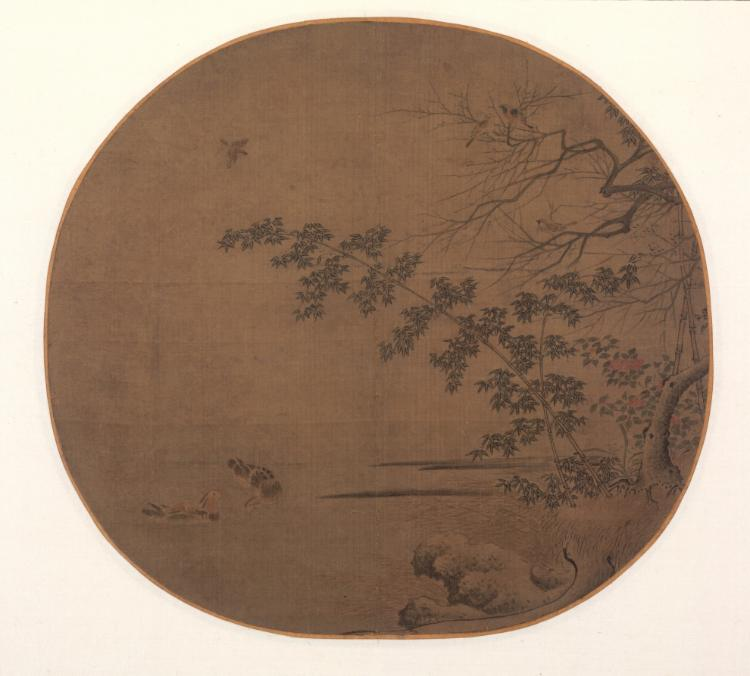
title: Birds on an Autumn Inlet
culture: China, Southern Song dynasty (1127–1279)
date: c. 1200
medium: Album leaf; ink and color on silk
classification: Painting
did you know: The pair of ducks displays plumage dimorphism with the male more ornamented or brightly colored than the female.